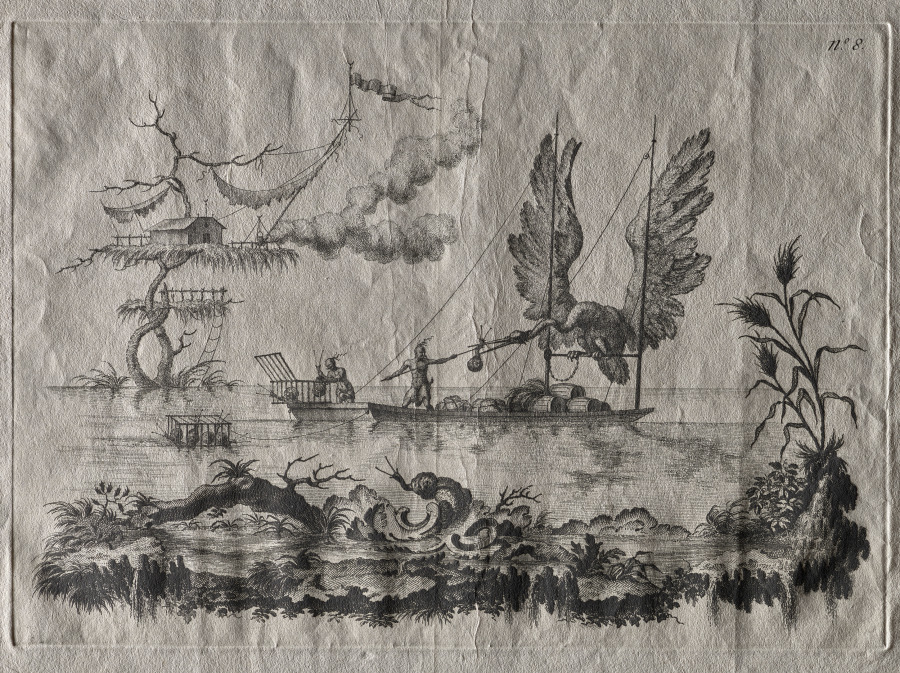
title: A Boat That Has for Sails the Wings of a Huge Bird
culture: Italy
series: Suite of the Most Notable Things Seen by John Wilkins Erudite English Bishop during His Famous Voyage from the Earth to the Moon … dedicated to Sir William Hamilton ambassador to the Court of Naples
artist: Filippo Morghen (Italian, 1730–after 1807)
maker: possibly after Jean-Pierre-Louis-Laurent Hoüel (French, 1735–1813)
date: about 1769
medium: etching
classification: Print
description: Filippo Morghen’s set of 10 etchings is outstanding among visual narratives of imaginary voyages to the moon, both visual and literary, that intrigued 18th-century European audiences. A title page and nine plates depict the imagined lives and economy of moon dwellers. These include modes of transport such as large birds and sailboats propelled by giant bellows, enormous scissors for capturing wild beasts (including an oversized rat), and the use of giant pumpkins as fishing boats and as dwellings. Representations of the moon dwellers are based on inaccurate and imaginary European interpretations of Asian, Ottoman, and Native American cultures—called chinoiserie and turquerie—that permeated the decorative and visual arts of the period.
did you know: Morghen based this print series on three books dedicated to moon exploration, including Bishop Francis Godwin’s, Man in the Moone, 1640.